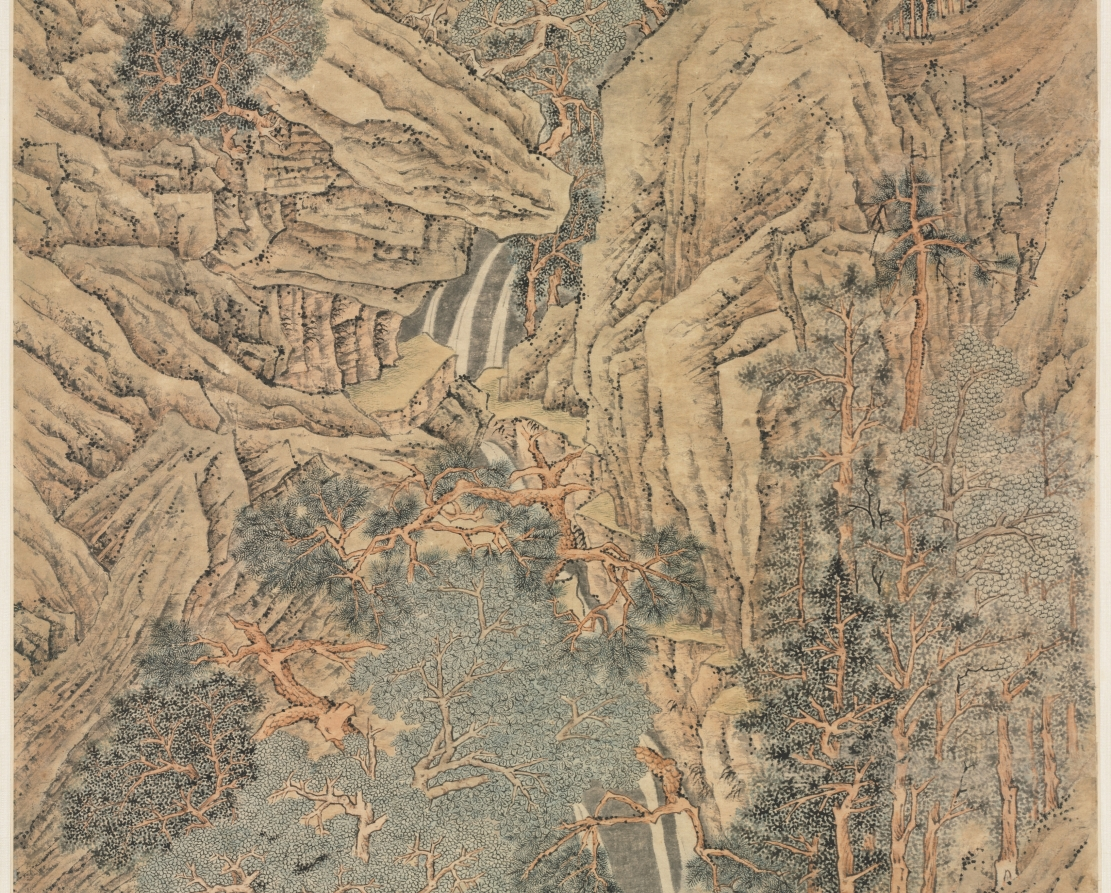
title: Playing the Qin in a Secluded Valley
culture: China, Ming dynasty (1368–1644)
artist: imitator of Wen Zhengming (Chinese, 1470–1559)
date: 1548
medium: hanging scroll; ink and light color on paper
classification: Painting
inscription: 幽壑鳴琴。 萬疊高山供道眼，千尋飛瀑淨塵心。 憑將一曲朱絃琴，小答松風太古音。 嘉慶戊申夏四月徵明製 [印] 徵明; 徵仲父印 [右下方] 悟言室印; 衡山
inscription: 4 additional seals: 3 of Cheng Qi 程琦 (1911–1988); 1 unidentified.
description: The poem inscribed in this painting reads: "Ten thousand layered lofty mountains are presented to the cultivated eye, A thousand feet of cascading falls cleanse the dusty heart. May the harmonies of my red-stringed tune Be the humble answer to the pine wind's ancient song." Different versions of this painting exist. Scholars have suggested that the solid renderings of the rock masses and the volumetric mountain configurations as seen here appear more characteristic of Lu Zhi 陸治 (1496–1576), Wen Zhengming's pupil.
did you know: In paintings, Chinese literati often play the instrument in a landscape setting, as the sound of the qin symbolizes harmony between man and nature.